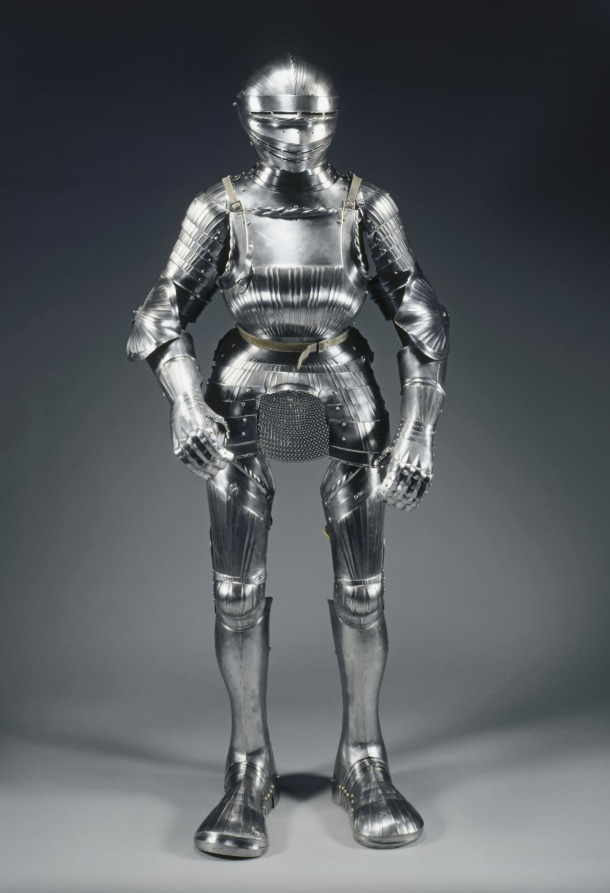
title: Field Armor in Maximilian Style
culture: Germany, Augsburg(?), early 16th century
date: c. 1510–15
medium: fluted steel with leather straps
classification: Arms and Armor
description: Most of the elements of this armor were made together, forming a single suit. The lower legs contain some modern restorations. The helmet is believed to be the work of the esteemed Augsburg armorer, Lorenz Helmschmied, who was active at the Habsburg, Mantua, and Urbino courts between 1467 and his death in 1515.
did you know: This armor was made to mimic the trend of pleated clothing that was popular at the time.